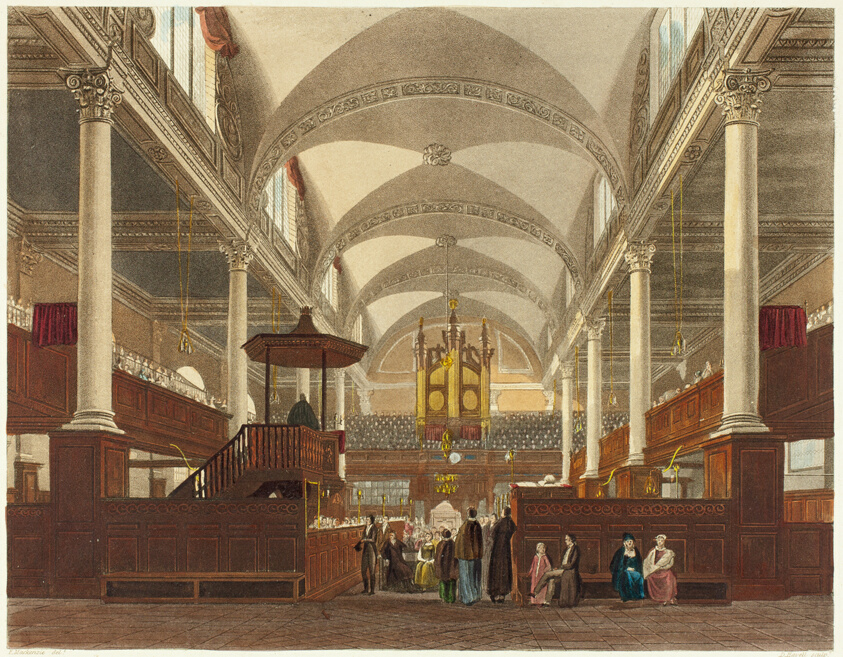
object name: Print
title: Interior of Christ Church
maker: Daniel Havell (English, 1785-1826)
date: 1816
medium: Aquatint, with hand-coloring, on paper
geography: England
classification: aquatint; print; prints and drawing